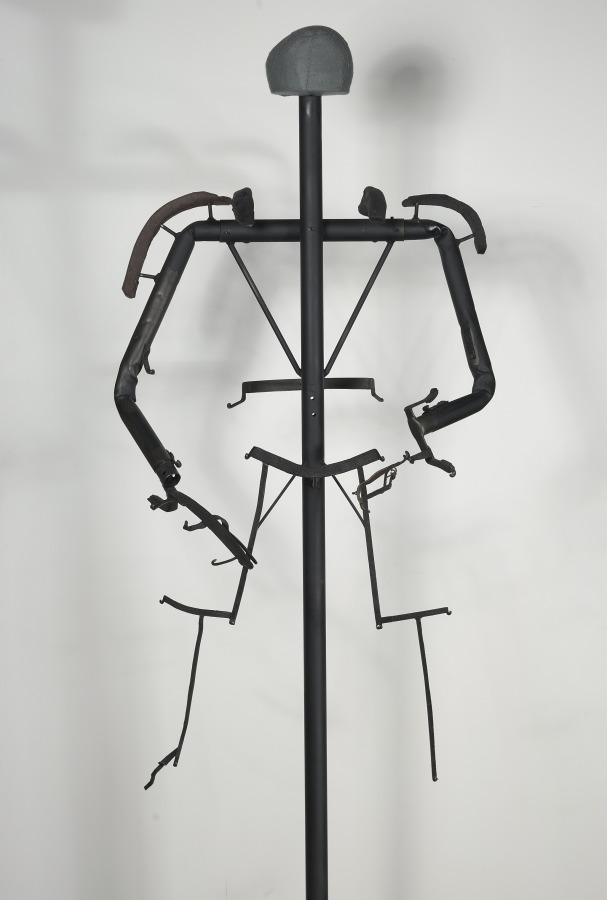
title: Cuirassier's Armor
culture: Austria, Graz(?), early 17th century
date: c. 1600–20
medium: steel (originally blued, now black); leather straps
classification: Arms and Armor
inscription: Proof mark (musket shot) is located on the proper left side of the breastplate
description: The cuirassier was the heavy cavalryman of the late 1500s and early 1600s. Carrying pistols and a sword, he was clad in full armor, like this suit, with the exception of his lower legs, which were protected by heavy riding boots. Shortly after 1650, such heavy cavalry armor disappeared from use. By then, European cavalries had abandoned full armor as impractical against the increased sophistication of firearms. Similar armors survive in the Armory of Graz, Austria.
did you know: This suit of armor is just over 5 1/2 feet tall.